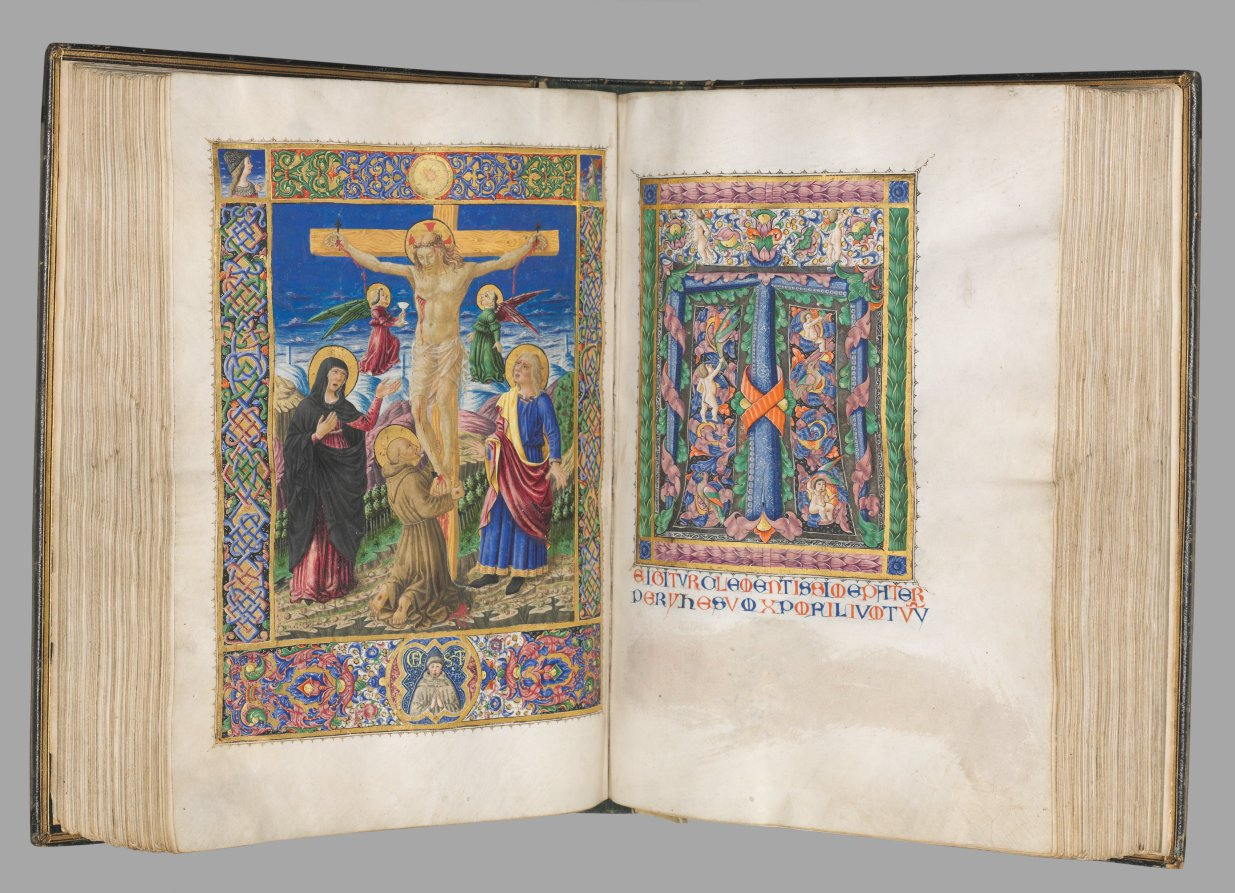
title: Missale: Fol. 186: Decorated Initial T[e igitur] (full page)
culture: Italy, Perugia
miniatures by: Bartolommeo Caporali (Italian, c. 1420–1503)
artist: assisted by Giapeco Caporali (Italian, d. 1478)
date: 1469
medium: ink, tempera and burnished gold on vellum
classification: Bound Volume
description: This illuminated manuscript once served as a liturgical service book used on the high altar by a priest for the Mass. The missal’s colophon (inscription) identifies the book as belonging to the church of San Francesco in Montone, a convent of Franciscan friars, and gives its date of completion as October 4, 1469. Here, the volume is opened to its masterpiece, two pages that introduce the canon of the Mass, the most solemn part of the celebration during which the priest consecrates the Eucharistic bread and wine. The missal receives its name from the two Perugian artists who collaborated to illuminate its pages. Here, the Calvary scene featuring the crucified Christ flanked by the Virgin and Saint John is the work of Bartolomeo Caporali, and the marginal decoration and the facing page are likely the work of his brother, Giapeco. Saint Francis’s appearance at the foot of the cross attests to the missal’s Franciscan use and affiliation.